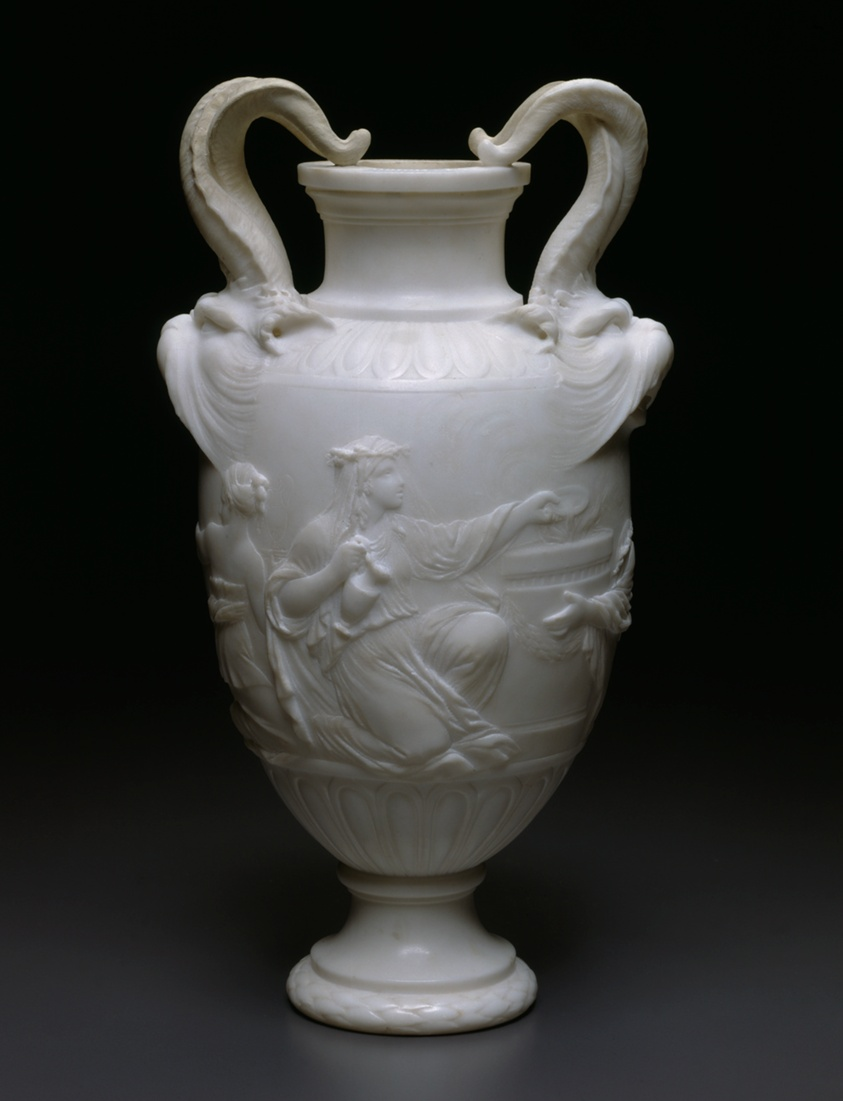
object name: Sculpture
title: Vase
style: 18th Century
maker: Clodion (Claude Michel; French, 1738–1814)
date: 1766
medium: Marble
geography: France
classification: vase; vessel; french; functional object; sculpture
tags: vase, sculpture